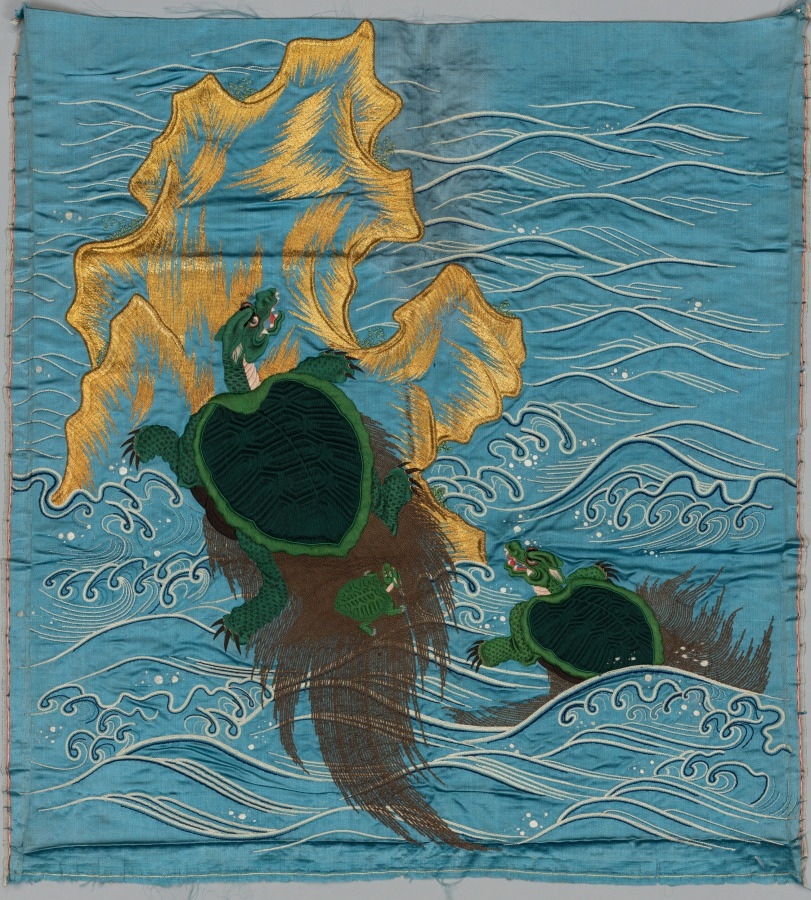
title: Embroidered Fukusa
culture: Japan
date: late 1800s-early 1900s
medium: embroidered silk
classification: Embroidery